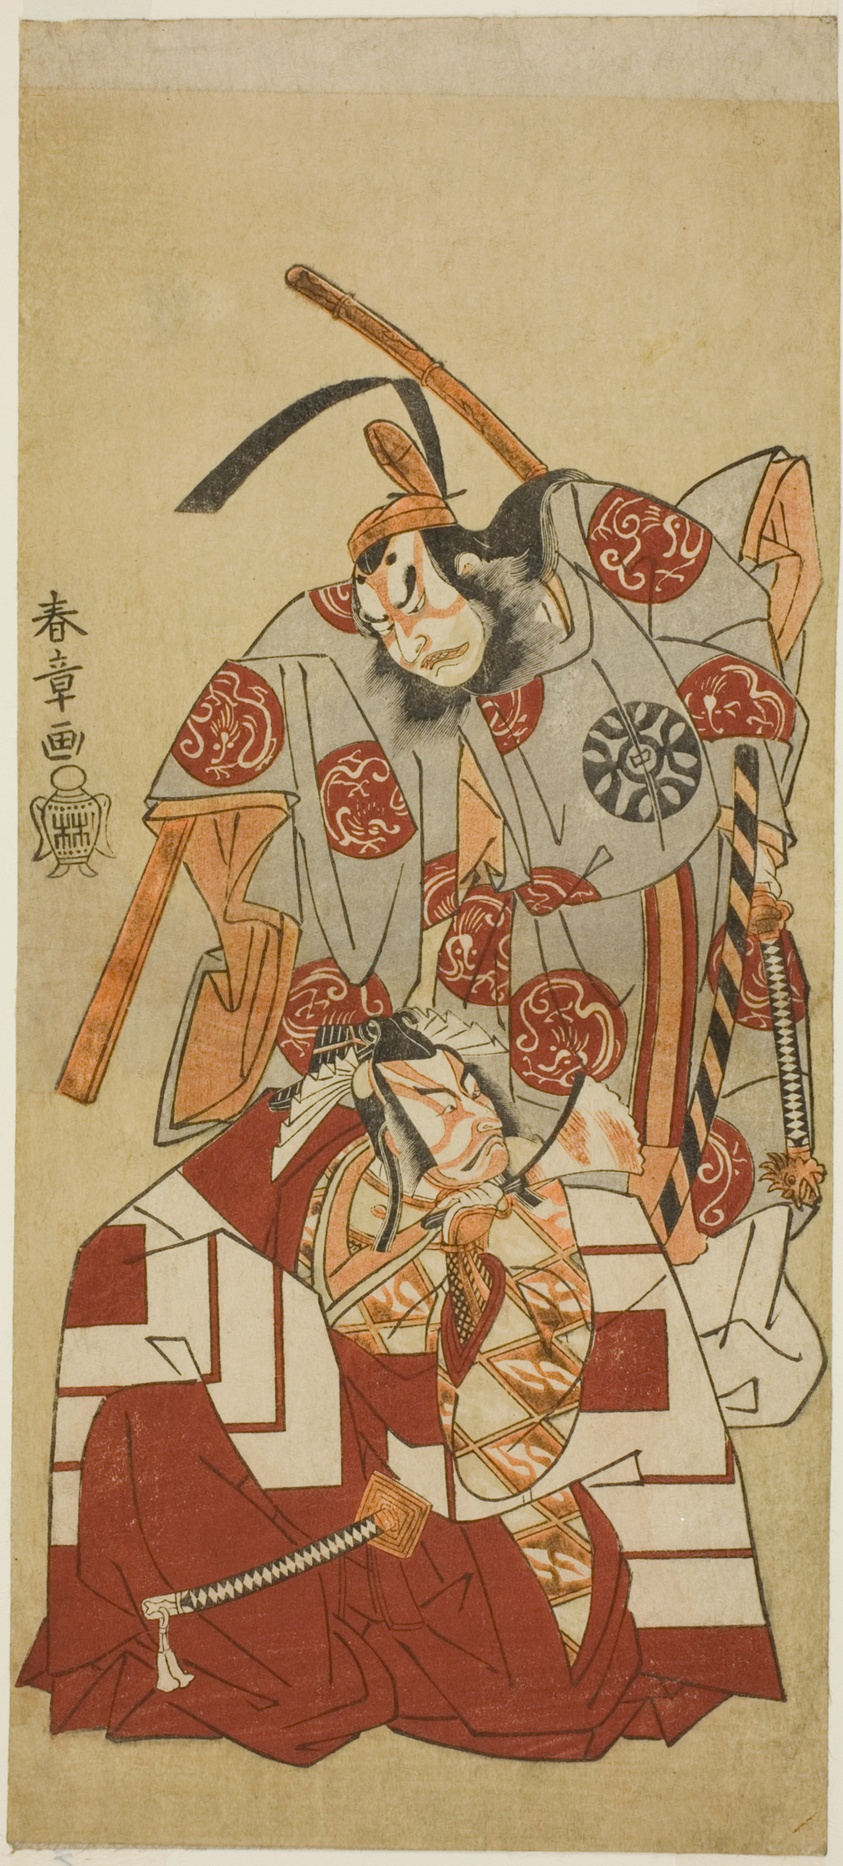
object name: Print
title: Actors Ichikawa Danjûrô V as Watanabe Kiou Takiguchi and Nakamura Nakazô I as Taira no Kiyomori in the “Shibaraku” scene from “Forest of the Nue Monster: Target of the Eleventh Month” (“Nue no Mori Ichiyô no Mato”)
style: Japanese (culture or style)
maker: Katsukawa Shunshô 勝川 春章; Japanese, 1726-1792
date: About 1770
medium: Color woodblock print; hosoban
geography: Japan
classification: woodblock print; print; asian art